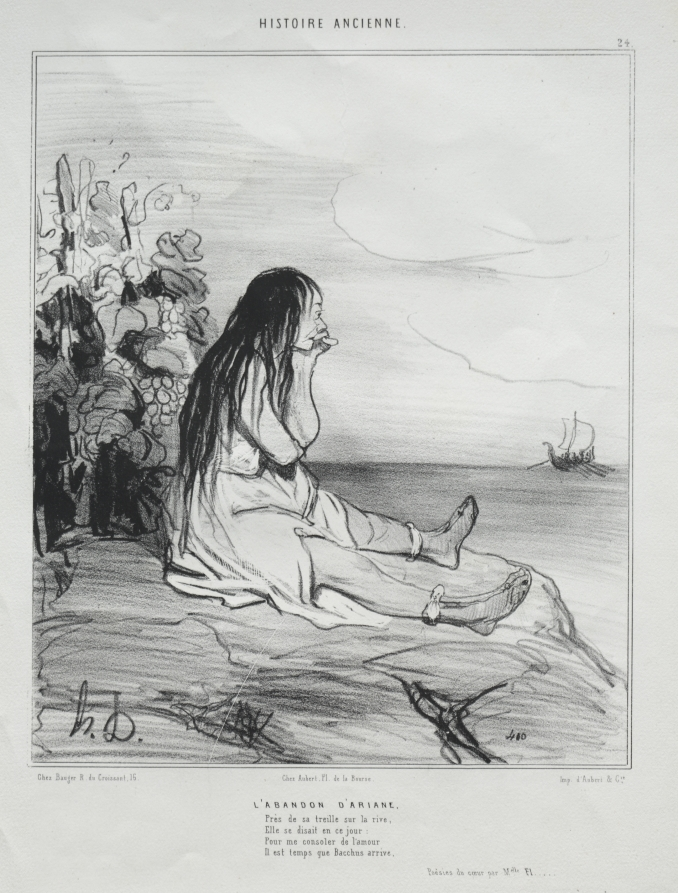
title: The Abandonment of Ariadne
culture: France, 19th century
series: Ancient History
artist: Honoré Daumier (French, 1808–1879)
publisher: Aubert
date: 1842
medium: lithograph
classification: Print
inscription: Upper margin, in pencil: L.D. 948 III/IV ; lower margin, printed: Chez Bauger, R. du Croissant, 16 / Chez Aubert, Pl. de la Bourse / Imp. d'Aubert & Cie. ; in pencil: Leg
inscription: Above image, printed: HISTOIRE ANCIENNE. 24 ; below image, printed: "L'ABANDON D'ARIANE. / Prés de sa treille sur la rive, / Elle se disait en ce jour: / Pour me consoler de l'amour / Il est temps que Bacchus arrive. / Poësies du coeur par Melle Fl...."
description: This print was first published in Le Charivari (September 4, 1842) as plate 24 from the series Ancient History.